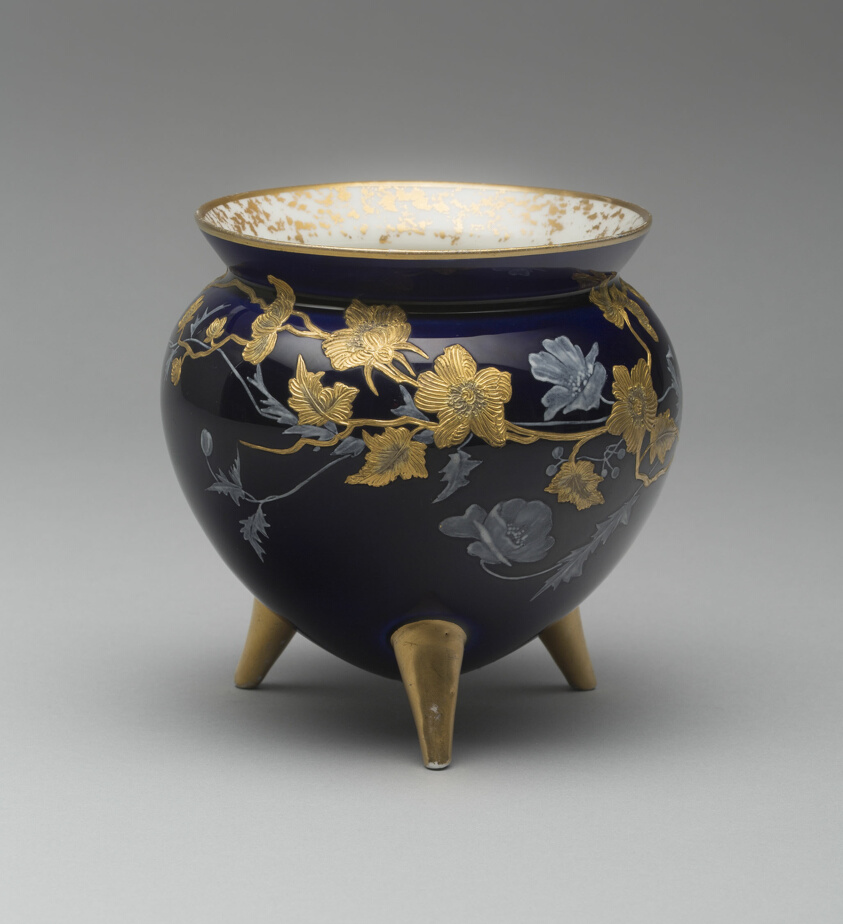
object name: Ceramics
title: Cachepot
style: Arts and Crafts Movement, Japanese (culture or style), english (style, influenced)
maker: Greenwood Pottery Company (American, 1868–1933); Trenton, New Jersey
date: 1883–86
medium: Porcelain and glaze with gilding and silvering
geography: Trenton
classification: cachepot; flowerpot; porcelain; art of the americas; bowl; pottery; ceramics; american decorative arts; american arts; decorative arts